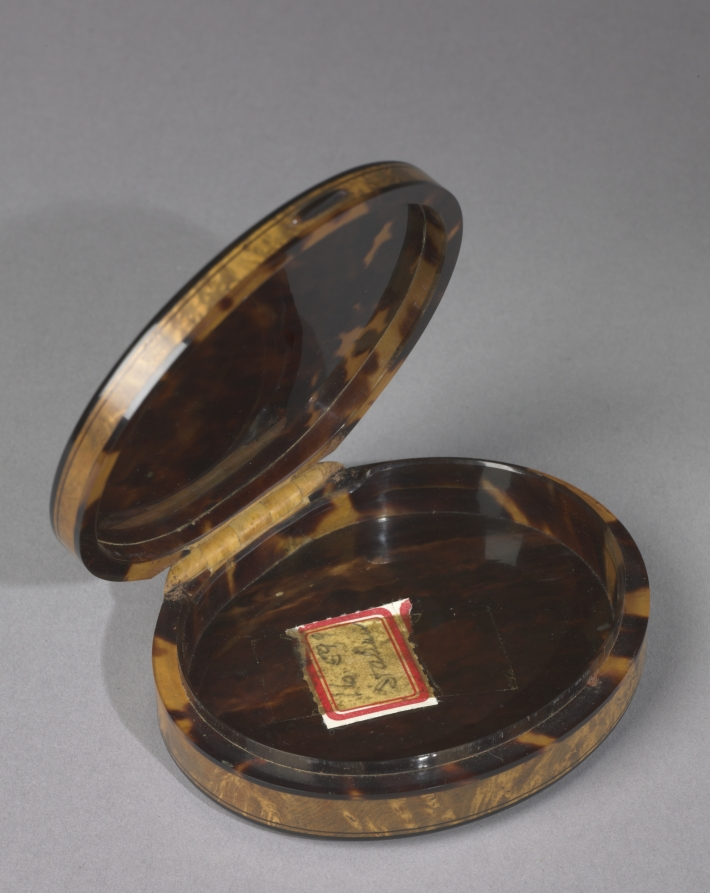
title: Snuff Box with Figures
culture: Continental, (France), late 18th century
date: late 18th century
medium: watercolor on ivory, wood and tortoiseshell with painted miniatues under glass and gilt metal mounts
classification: Miscellaneous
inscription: inscribed on funerary urn: "ci GIT" and below a scull and crossbones.